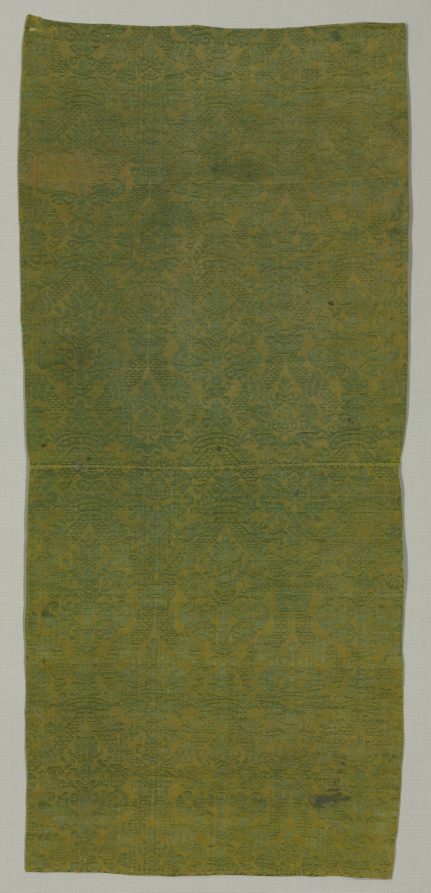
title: Silk Fragment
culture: Spain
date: 1500s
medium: fancy satin weave (damask): silk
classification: Textile